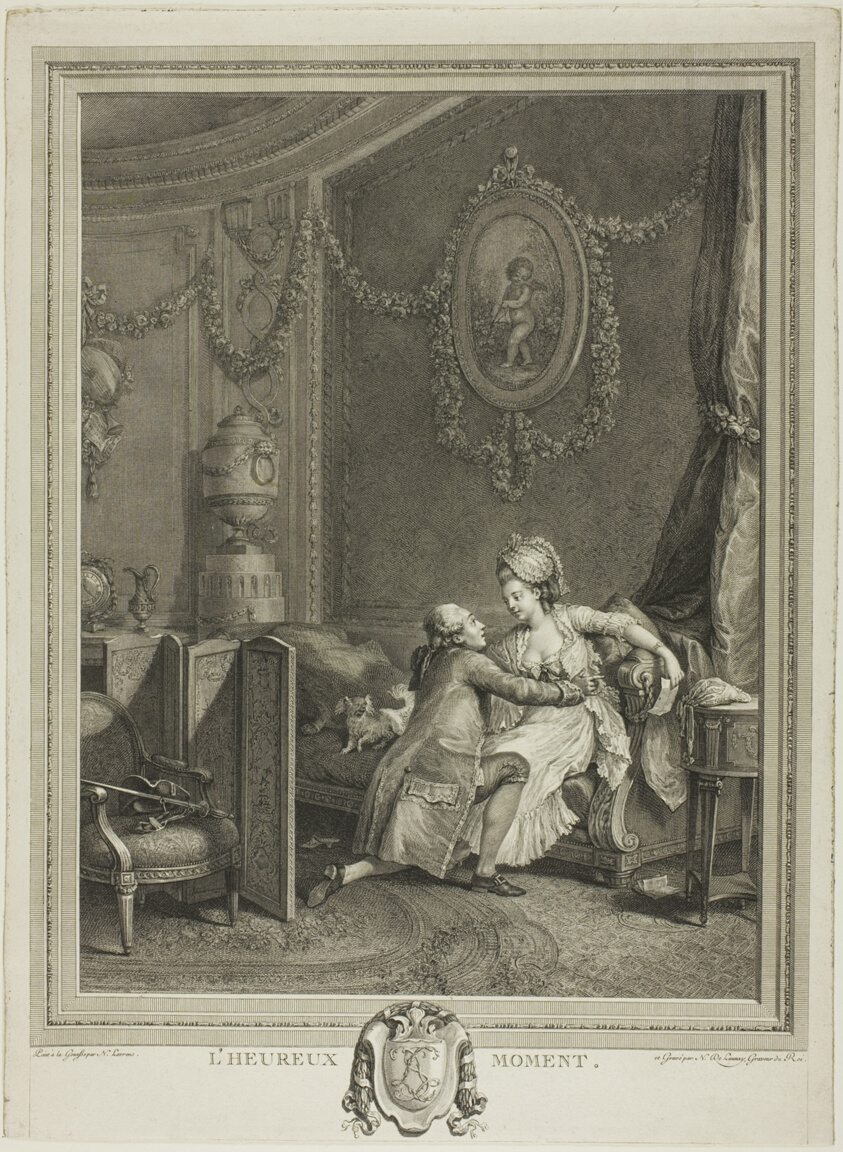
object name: Print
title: Happy Moment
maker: Nicolas Delaunay (French, 1739-1792); after Nicolas Lavreince (Swedish, 1737-1807)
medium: Etching on paper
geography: France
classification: etching; print; prints and drawing